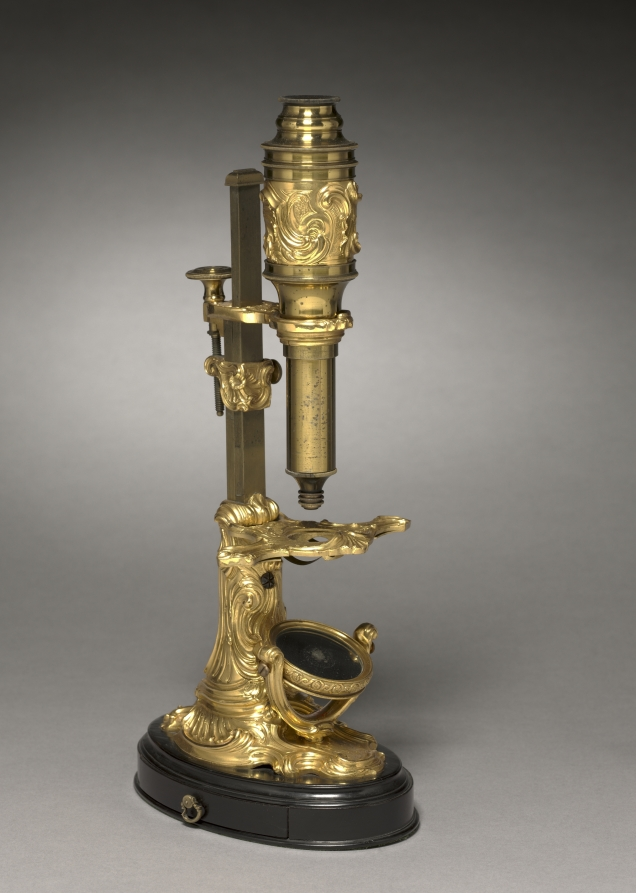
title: Microscope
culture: France, mid-18th century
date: c. 1745– 1765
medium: gilt bronze mounts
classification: Metalwork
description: Composed of elaborate gold-plated parts, this microscope is not just a decorative work of art; it is also a functional tool for scientific inquiry. Its ornamentation reflects the intermingling of art and science during the European Enlightenment, an era when scholars emphasized the study of science and reason as a means of social and intellectual progress. The two lenses of a compound microscope allow for better focus and magnification, making it easier for scientists—amateur and professional alike—to look closer at a specimen to see more than can be seen by the naked eye. This microscope’s ornate decoration suggests it was probably owned by a wealthy person, possibly an amateur scientist. A version of an 18th-century English poem playfully describes what can be newly seen with a microscope: Great fleas have little fleas Upon their backs to bite ’em The little fleas have lesser fleas And so ad infinitum.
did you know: Microscopes, especially ones as elaborate as this example, were luxurious symbols of enlightened aristocratic sophistication in the 1700s.